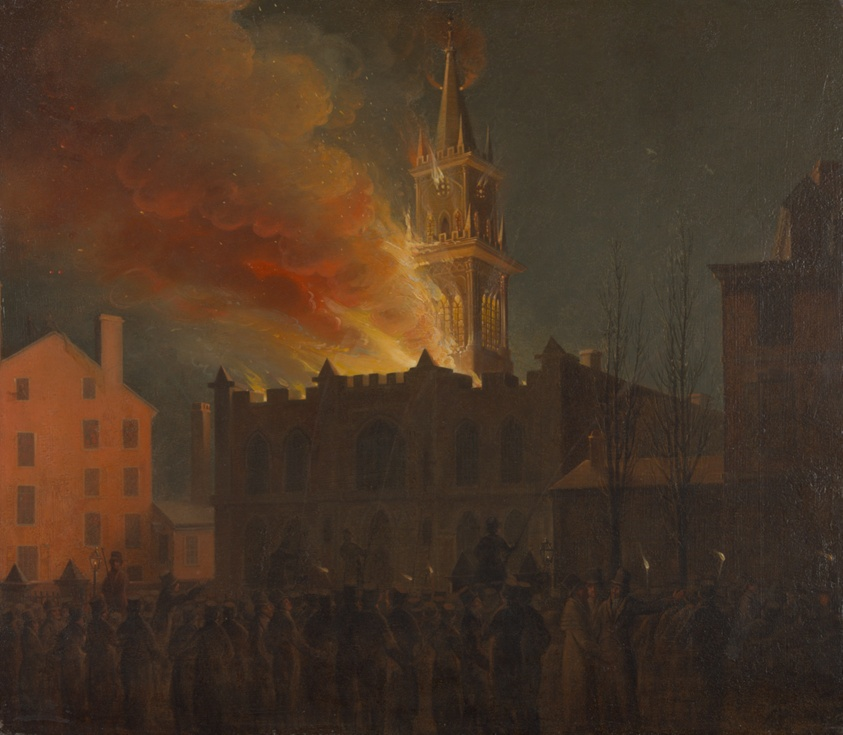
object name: Painting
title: Conflagration of the Masonic Hall, Chestnut Street, Philadelphia, Pennsylvania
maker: Samuel Jones; American, 19th century; Possibly John Lewis Krimmel; American, born Germany, 1786–1821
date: 1819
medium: Oil on mahogany panel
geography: Philadelphia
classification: painting; american arts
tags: architecture